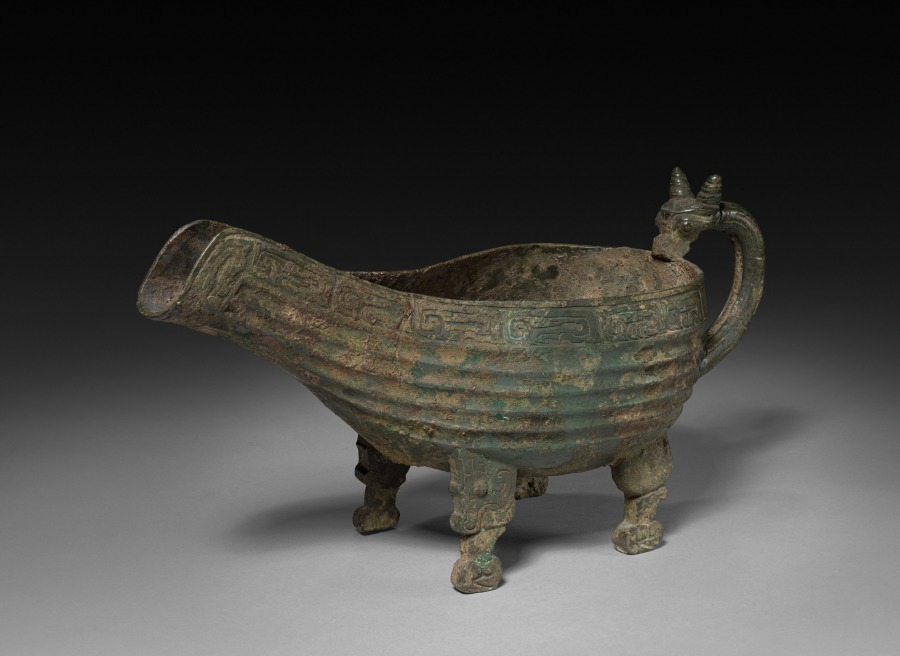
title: Yi: Libation Vessel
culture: China, Zhou dynasty (c. 1046–256 BCE)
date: c. 900–600 BCE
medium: bronze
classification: Metalwork